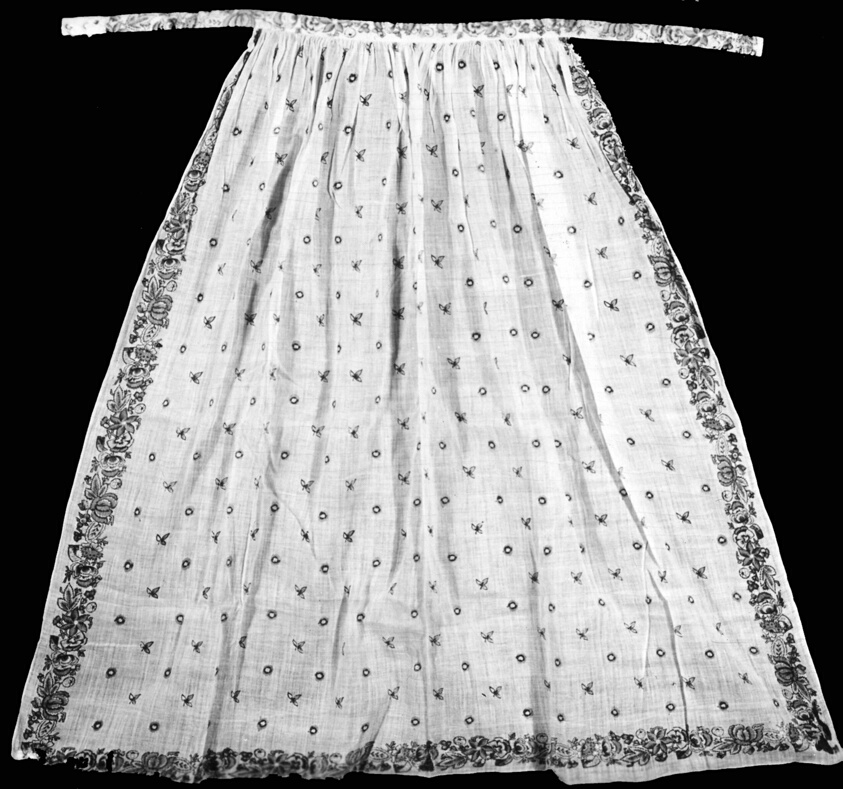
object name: Costume and Accessories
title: Apron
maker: United States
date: c. 1875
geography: United States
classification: textile; costume; weaving - printed; dress (garment); clothing